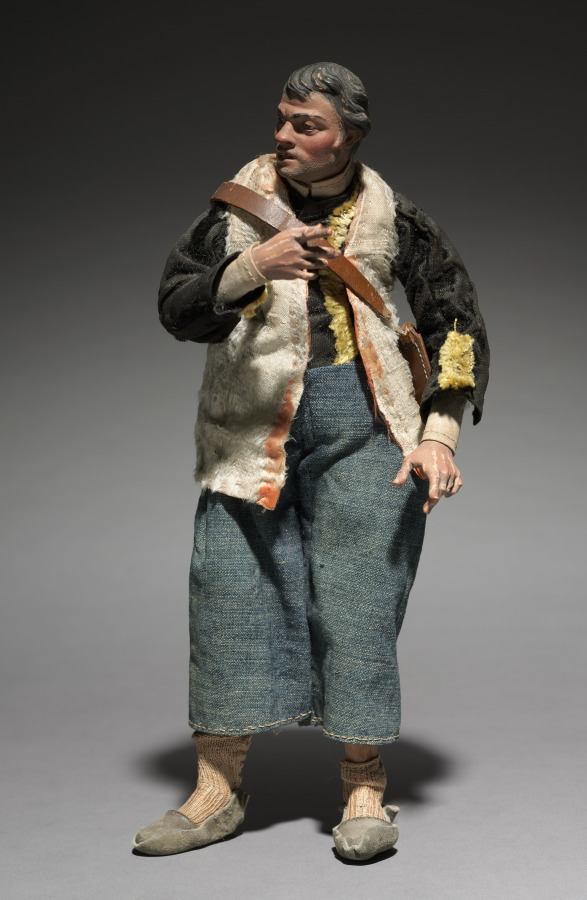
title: Figure from a Crèche: Standing Man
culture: Italy, Naples, late 18th-early 19th century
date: 1780–1830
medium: painted wood and terracotta with various textiles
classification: Sculpture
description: The practice of creating scenes of the Nativity for the home dates from the early 1700s in Italy, where people began to set up doll-like figures of about a foot or less in height. The custom was particularly popular in Naples around 1800, where crèche scenes (crèche means cradle, or crib) included many figures, whose heads and hands of painted terracotta, stuffed cloth bodies, and clothing adapted from contemporary local costumes gave them an amazingly realistic character. Representations of the birth of Jesus can be traced to the first few centuries of Christianity. Both living creatures and sculptural depictions of them were used from early times. By the late middle ages it was customary to create life-size figures of wood or stone, naturalistically painted, to represent the characters who participated in the events of Jesus's early life. These sculptures were then arranged in scenes illustrating one or both of the most important of these events, the Adoration of the Shepherds and the Adoration of the Magi-the three kings from the East who came to pay homage to the Christ child. Used in churches, these large figures were especially popular in Italy, Central Europe, Spain, and Portugal.